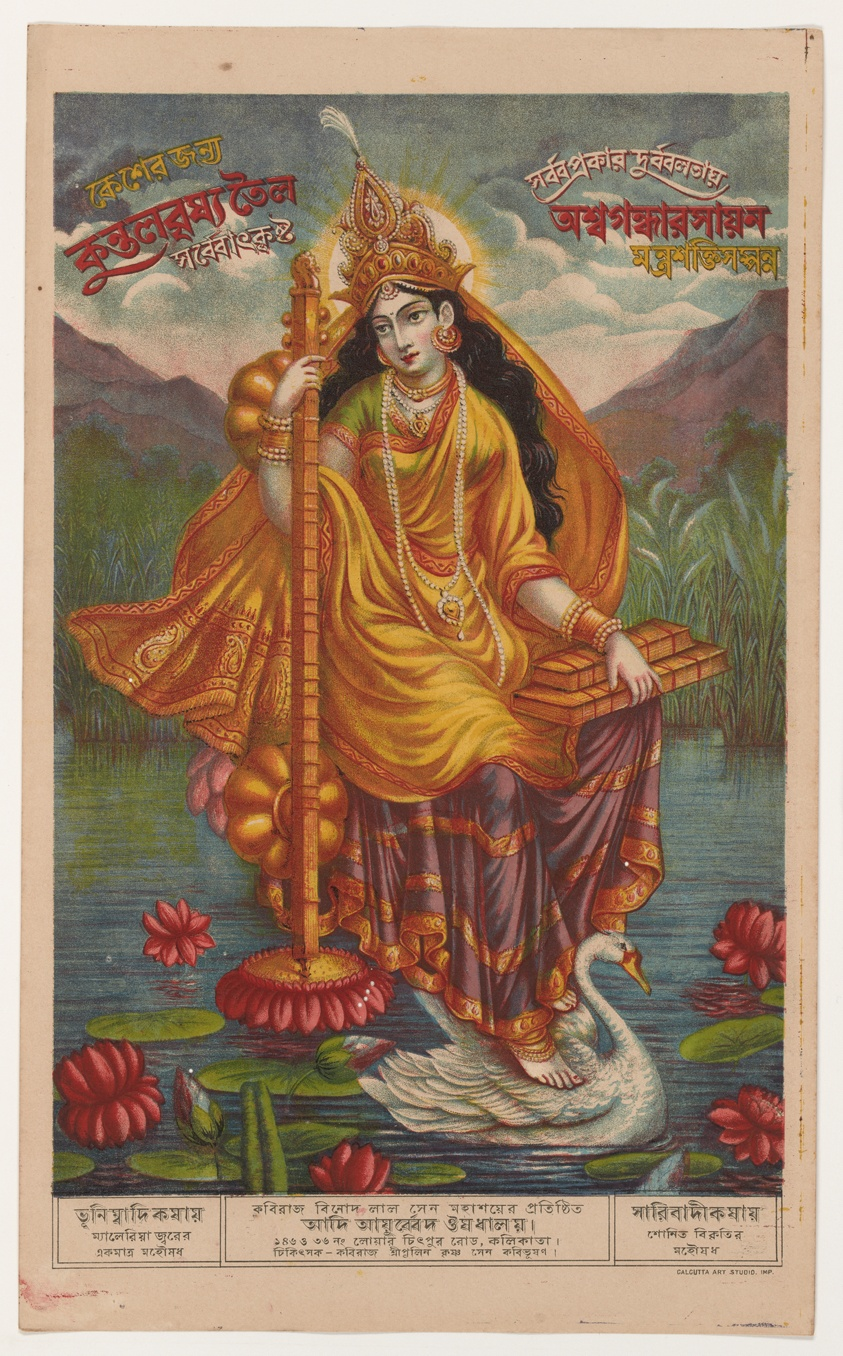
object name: Print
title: Sarasvati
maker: Artist Unknown (likely Indian, 19th century); published by Calcutta Art Studio (Indian, 19th century)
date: 1878/80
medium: Stipple color lithograph on cream wove paper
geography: India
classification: print; lithograph; paper; prints and drawing